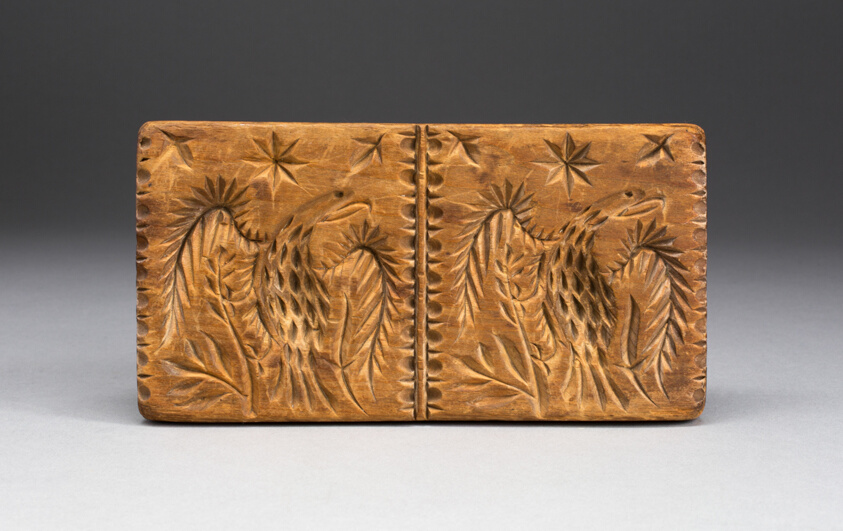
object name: Decorative Arts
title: Cookie Mold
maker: Artist unknown (American, 18th–19th century); Pennsylvania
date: 1790–1875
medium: Pine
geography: Pennsylvania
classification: wood; american decorative arts; american arts; decorative arts